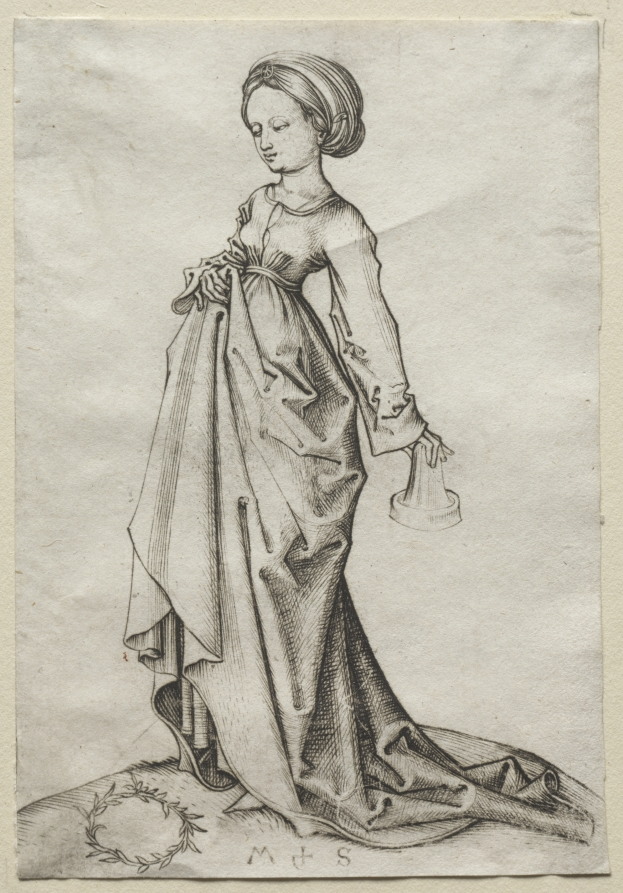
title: The Second of the Foolish Virgins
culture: Germany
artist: Martin Schongauer (German, c. 1450–1491)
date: ca. 1490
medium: engraving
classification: Print